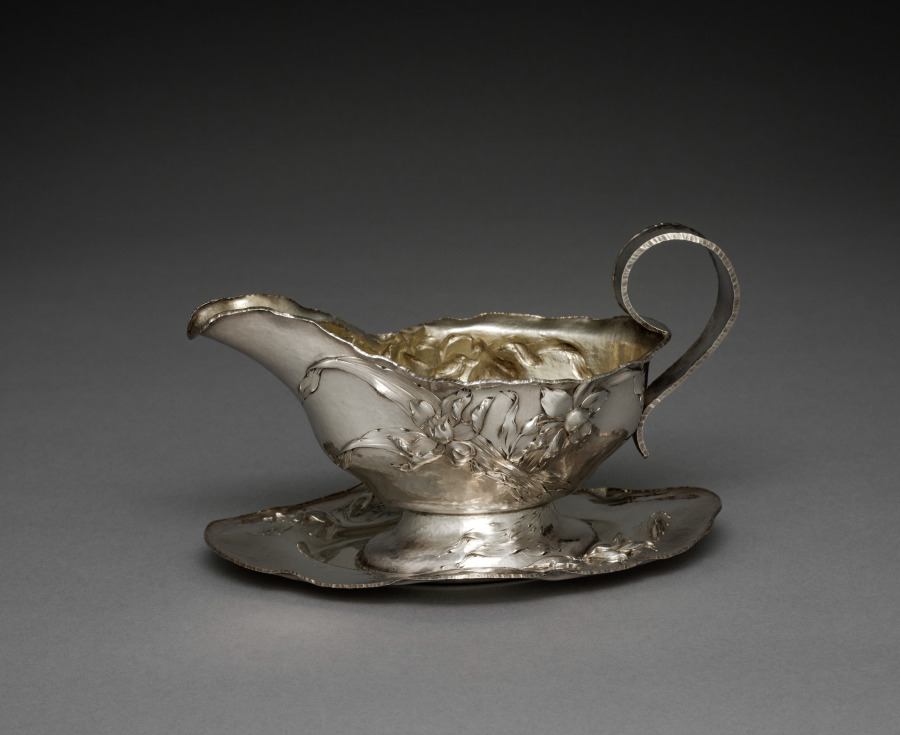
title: Sauce Boats and Trays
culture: America, Rhode Island, 19th century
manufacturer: Barbour Silver Company (American)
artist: attributed to William Christmas Codman (British, 1839–1921)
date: c. 1890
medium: silver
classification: Silver